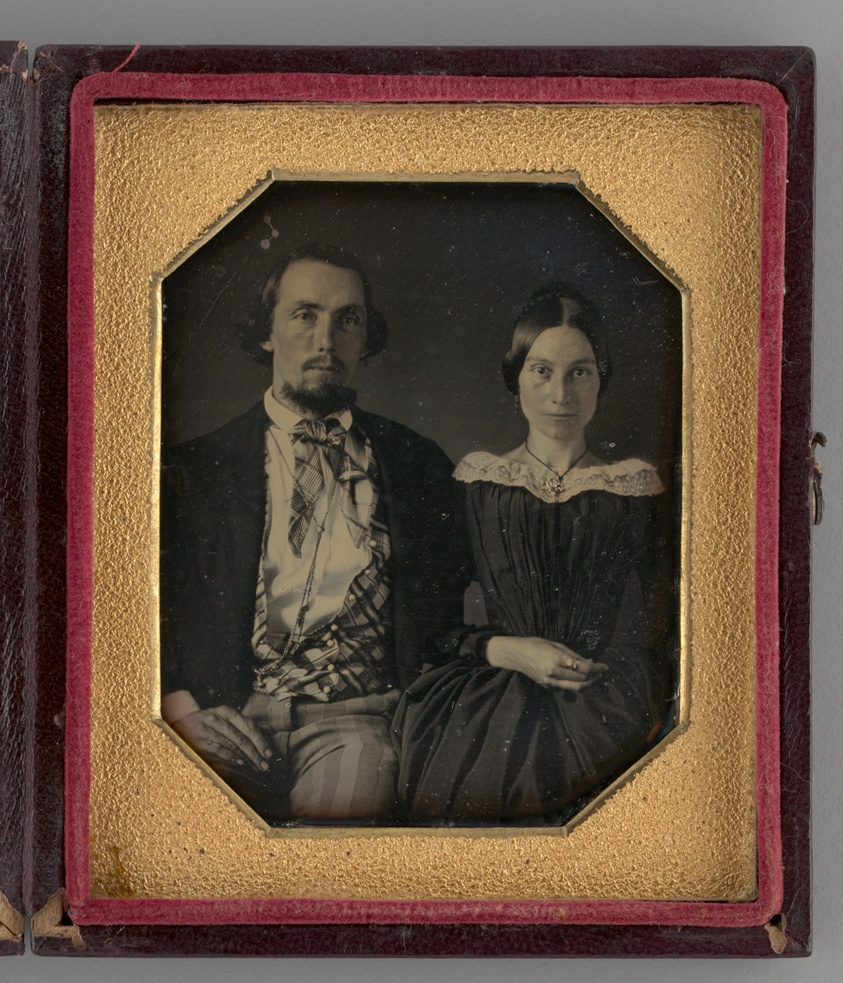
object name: Photograph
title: Untitled (Portrait of a Woman and a Man)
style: 19th century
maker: Unknown maker; American, 19th century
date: 1844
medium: Daguerreotype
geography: United States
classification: portrait; photograph; photographic process; photography; portrait; daguerreotype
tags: lundberg collection, portraits: multiple subjects, portraits: male subject, portraits: female subject, portrait, couples, portraits